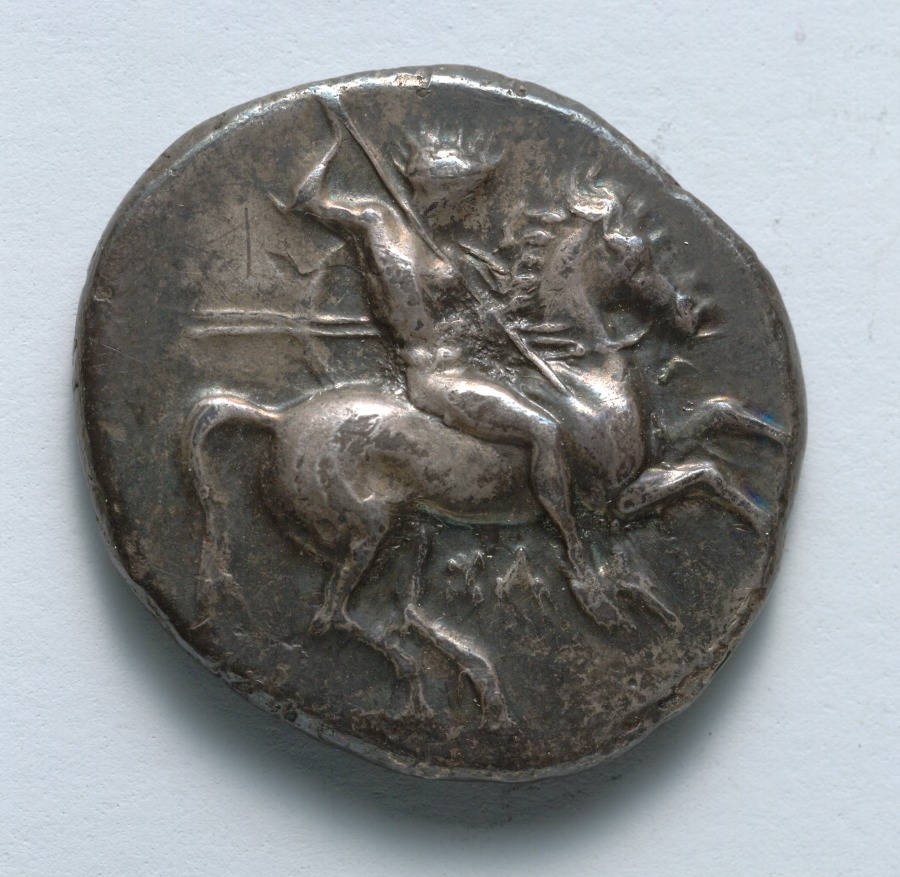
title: Stater: Nude Warrior on Horseback (obverse); Taras (reverse)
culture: Greek, minted at Taras (South Italy)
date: 334–302 BCE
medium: silver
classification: Coins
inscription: ΤΑΡΑΣ